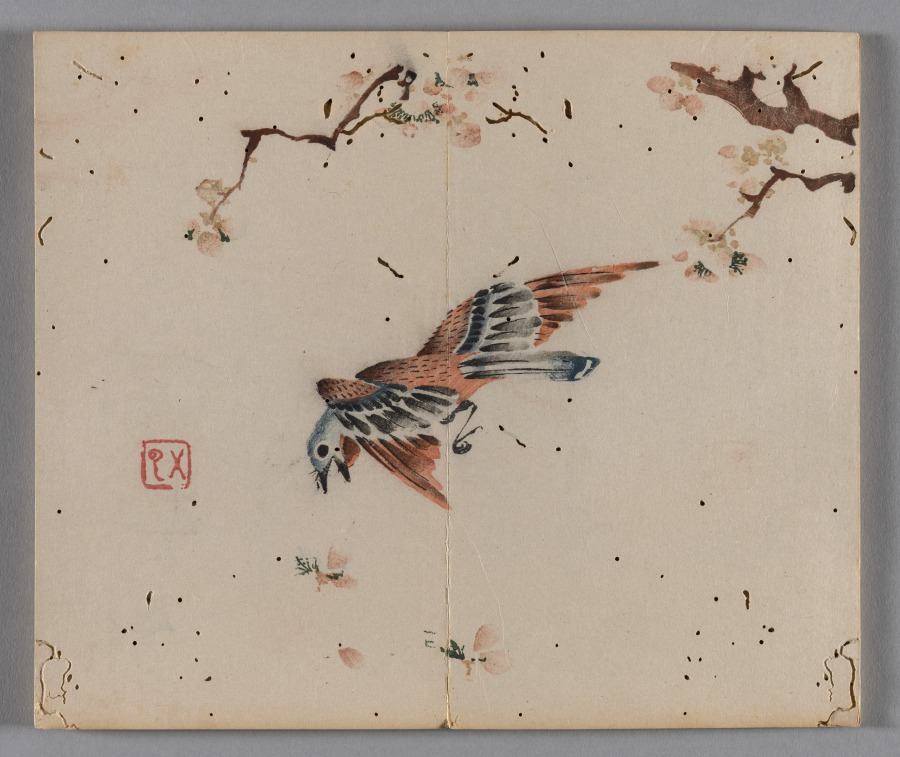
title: Ten Bamboo Studio Painting and Calligraphy Handbook (Shizhuzhai shuhua pu): Birds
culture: China, Qing dynasty (1644-1911)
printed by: Hu Zhengyan (Chinese, c. 1584–1674)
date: 1633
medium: Woodblock-printed book; ink and colors on paper; first edition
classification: Print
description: Color printing reached a level of perfection in the early 1600s, as seen in this Ten Bamboo Studio Collection of Calligraphy and Painting and the Mustard Seed Garden Manual of Painting (printed 1679 and 1701). The painterly quality, precision in registering (aligning) the woodblocks, and harmonious colors made them the most successful color print editions in Chinese history. Both editions were printed and compiled in Nanjing, spread nationwide, and had a great impact on the arts in Japan and Korea.